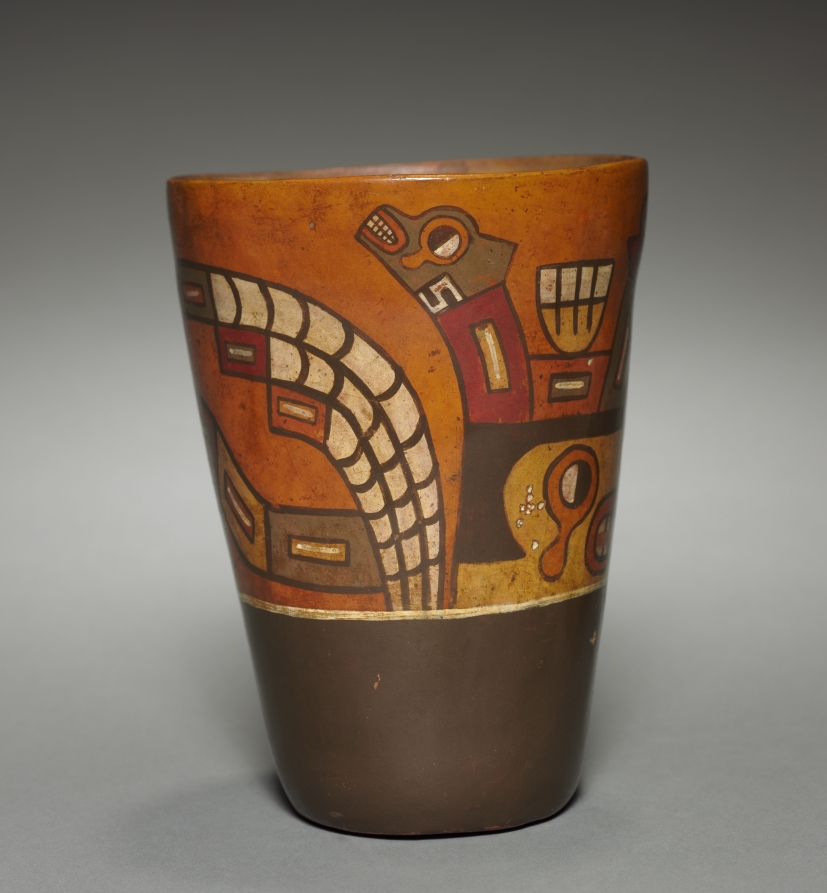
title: Kero-shaped Vessel (modern version of a Wari-style vessel)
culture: Peru, modern, 20th century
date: before 1955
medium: pottery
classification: Forgery